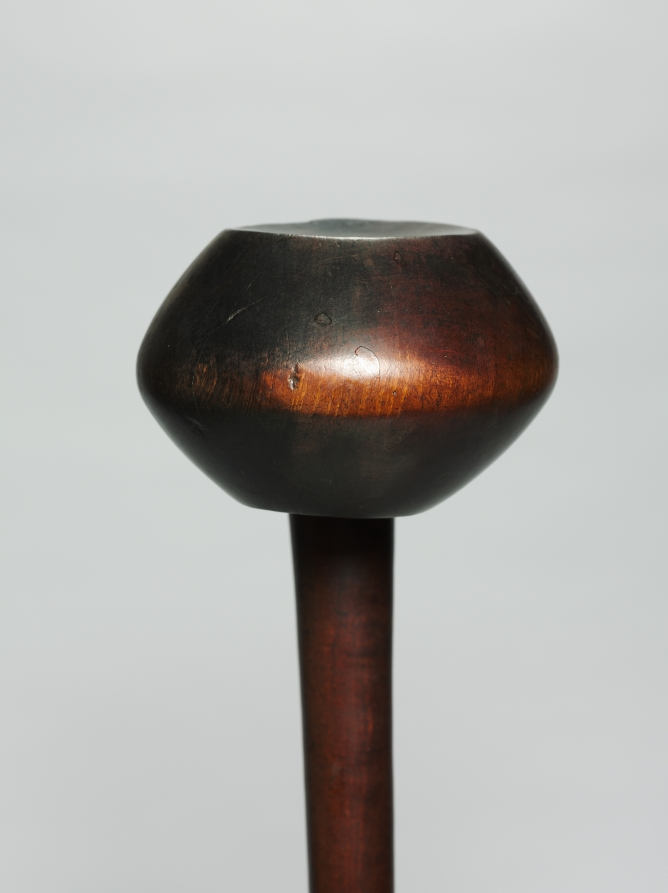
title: Club (Knobkerrie)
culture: Southern Africa, South Africa, Northern Ngun-style or Zulu-style maker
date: late 1800s or early 1900s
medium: Wood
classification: Arms and Armor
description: Relatively short sticks historically used for hunting and fighting are customarily called knobkerries. A combination of Afrikaans and Shona words, the name refers to the characteristic spherical knob of wood (knop) or head atop a cylindrical shaft (kirri). The knobs on these were carved into a tight whorl and a compressed sphere with a central rib. Even though their basic shapes were derived from real weapons, many of these precious objects were rarely if ever used as such. Highly personal, they instead functioned as ceremonial display items or regalia, symbolizing the masculinity and prowess of their owner.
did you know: The term knobkerrie refers to a characteristic spherical knob of wood or head atop a cylindrical shaft.